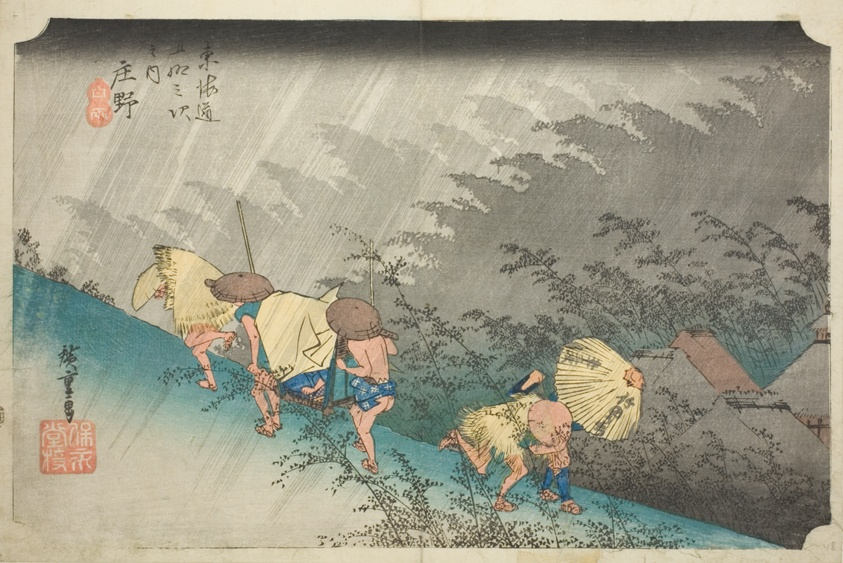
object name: Print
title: Shono: Driving Rain (Shono hakuu), from the series "Fifty-three Stations of the Tokaido (Tokaido gojusan tsugi no uchi)," also known as the Hoeido Tokaido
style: Japanese (culture or style)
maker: Utagawa Hiroshige 歌川 広重; Japanese, 1797-1858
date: c. 1833/34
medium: Color woodblock print; oban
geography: Japan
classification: woodblock print; print; asian art